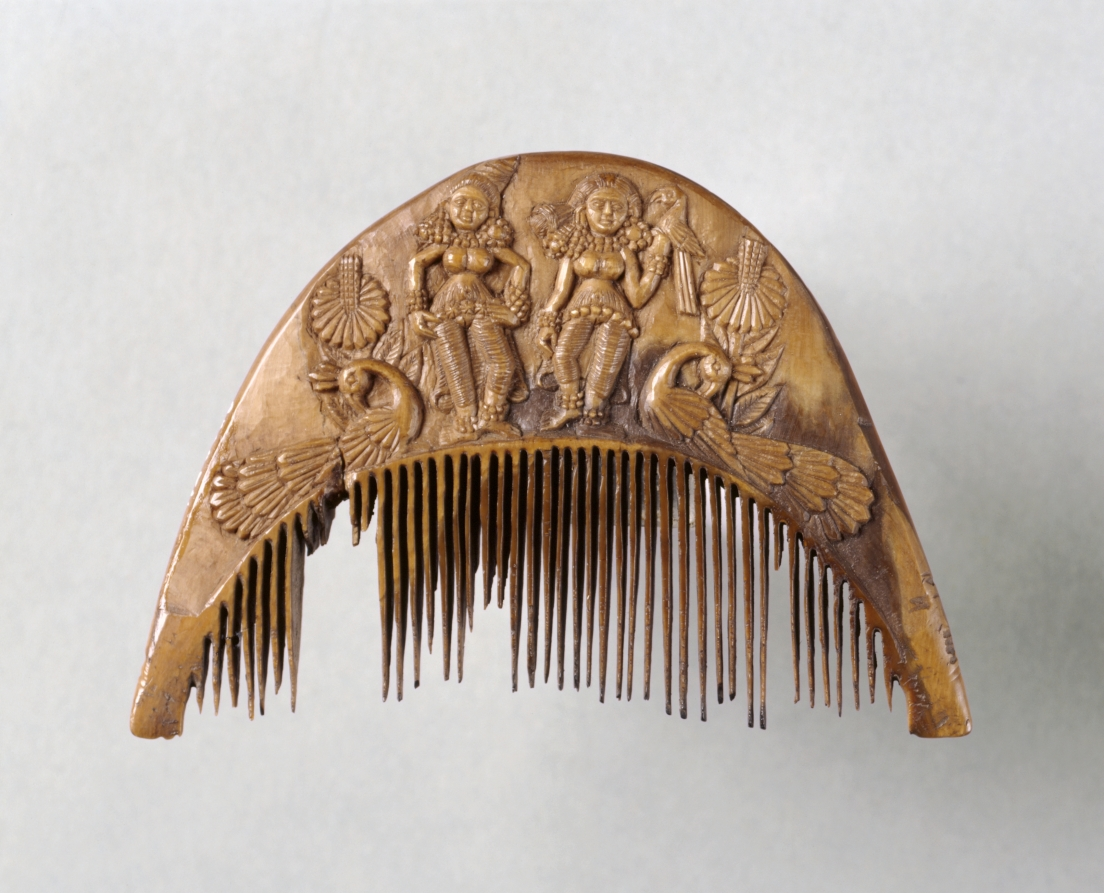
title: Comb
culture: India, Bengal, Chandraketugarh area, Shunga period (185–78 BCE)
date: 200 BCE–100 CE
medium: ivory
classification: Ivory